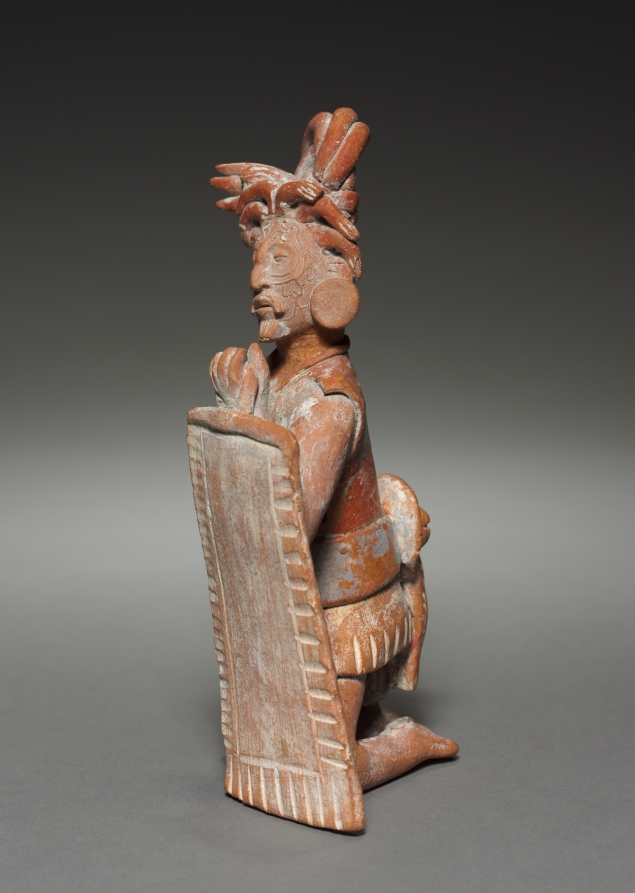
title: Warrior Figurine with Shield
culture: Mexico, Classic Maya, Jaina style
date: 600–900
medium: molded and modeled pottery with traces of pigment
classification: Sculpture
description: Maya figurines portray a wide range of human, animals, and supernatural beings. This example represents a kneeling warrior who holds a rectangular shield and wears elaborate ornaments, including huge ear spools. The expressive, delicate head was made in a mold; the body was hand modeled.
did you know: Elaborate facial tattoos and a bivalve pendent identify this warrior as a sajal, a second-tier noble.